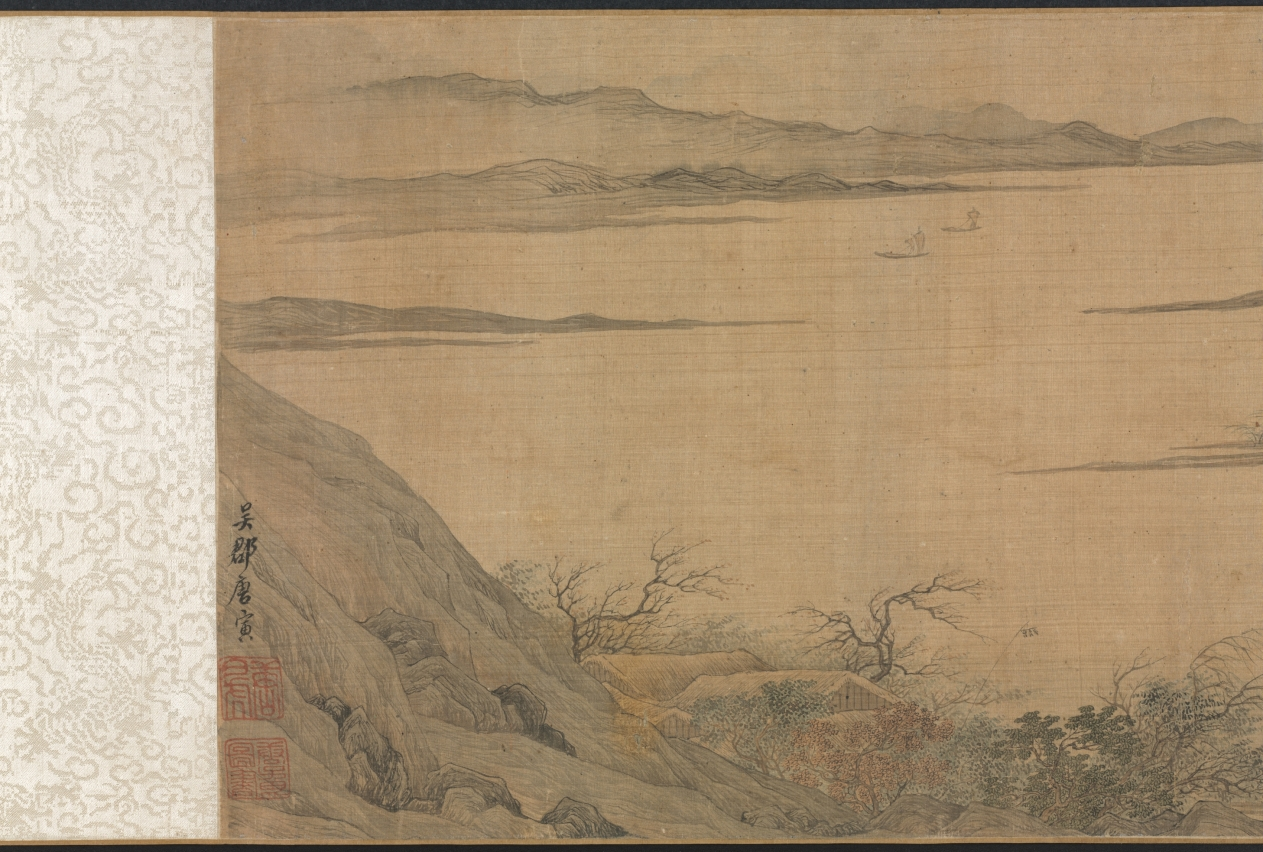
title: Scholar-Hermits in the Autumn Mountains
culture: China, Ming dynasty (1368–1644)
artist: Tang Yin (Chinese, 1470–1523)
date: 1500–1510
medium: handscroll, ink and light color on silk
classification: Painting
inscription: Artist's signature and 2 seals at end of scroll: Tang Yin [seals] T'ang Po-hu; T'ang Tzu'wei t'u-shu.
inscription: Title on frontispiece by Li Cho-kung (dates unknown).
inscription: 1 colophon and 11 additional seals: 1 colophon dated 1915 of Wu Tso-hsi (19th-20th c.); 2 seals of Gao Qifeng 高奇峰 (1889–1933); 5 seals of C. C. Wang 王季遷 (1907–2003); 4 seals unidentified.